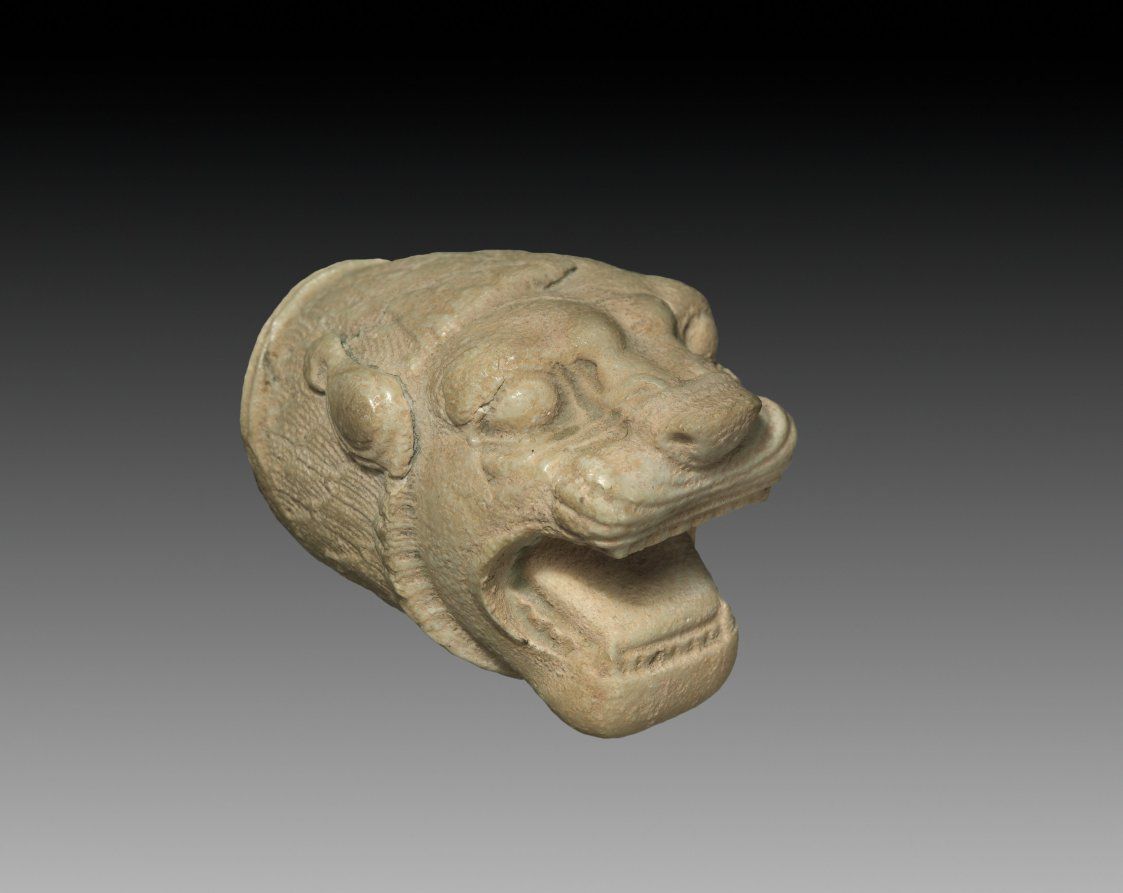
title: Lion's Head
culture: Iran, Achaemenid (550–330 BCE)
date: 500s BCE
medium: marble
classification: Sculpture